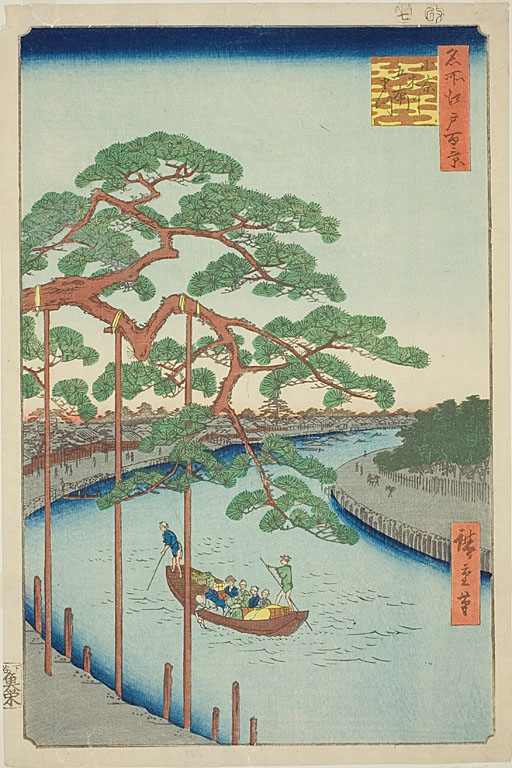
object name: Print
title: The Five Pines on the Onagi River (Onagigawa Gohonmatsu), No.97 from the series “One Hundred Famous Views of Edo (Meisho Edo hyakkei)”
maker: Utagawa Hiroshige (Japanese, 1797-1858)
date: 1856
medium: Color woodblock print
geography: Japan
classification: woodblock print; print; asian art